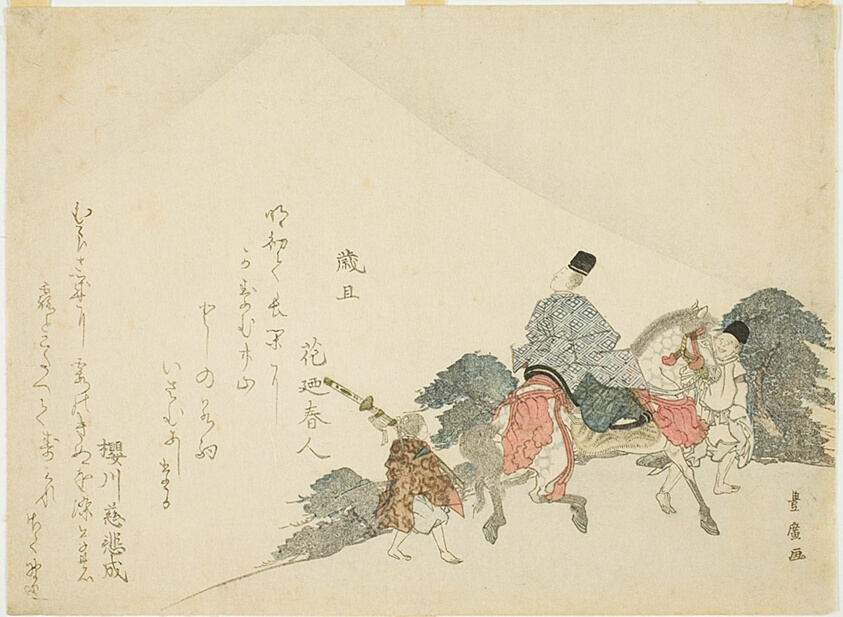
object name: Print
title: Gazing at Mt. Fuji on the Horse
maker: Utagawa Toyohiro (Japanese, 1773-1828)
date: 19th century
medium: Color woodblock print; surimono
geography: Japan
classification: woodblock print; print; asian art